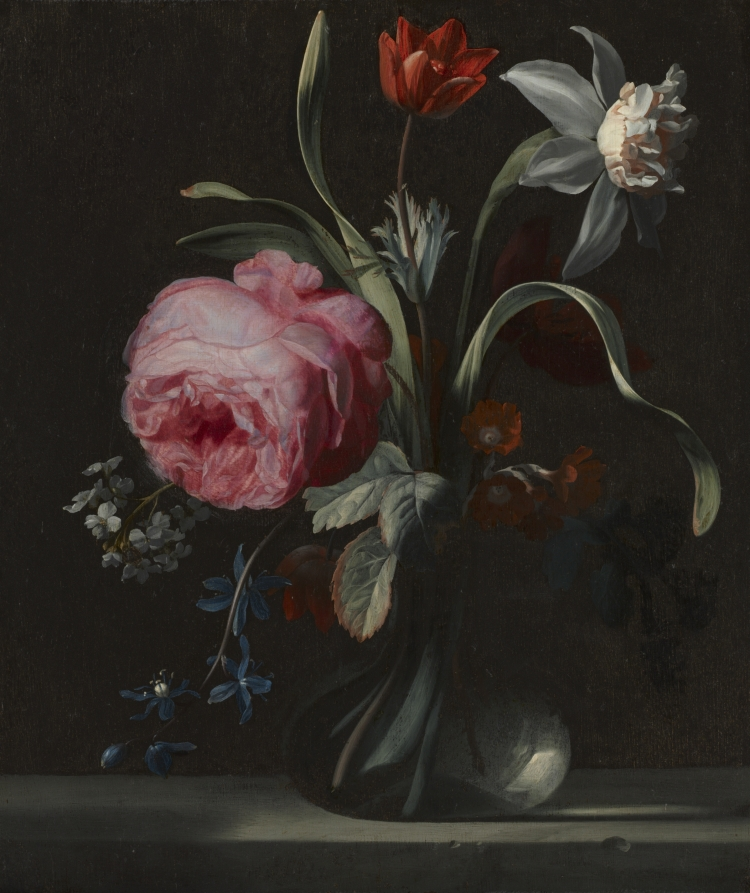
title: Flowers in a Vase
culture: Netherlands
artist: Simon Verelst (Dutch, 1644–1721)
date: c. 1669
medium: oil on wood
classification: Painting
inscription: signed S.V.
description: With just a few flowers, Verelst created a composition of great sophistication and balance. A simple glass flask is filled with a large rose, a red anemone, and a white narcissus tinged with pink. These flowers are surrounded by a scattering of smaller blossoms. Like many still-life painters, Verelst depicted a window reflected in the glass vase, but here he did not show the window's precise structure. He did, however, use another common device: the depiction of a few chips in the stone surface to make the material seem more tangible. Early in his career, Verelst moved from Holland to London, where he worked for the court of King James II and was extravagantly praised for the realism of his flower paintings.